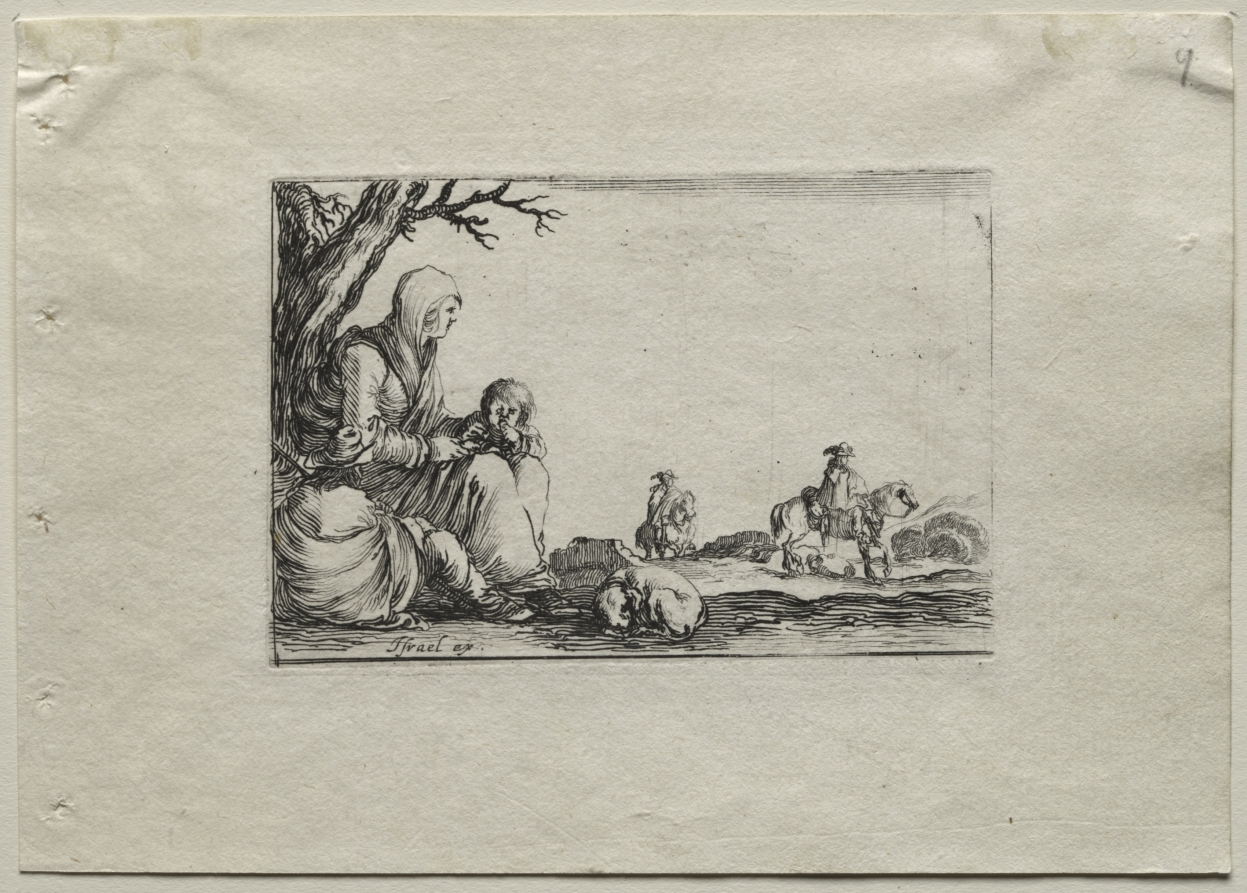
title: Caprices: Seated Beggar Woman with Two Children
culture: Italy, 17th century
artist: Stefano Della Bella (Italian, 1610–1664)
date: c. 1642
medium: etching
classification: Print